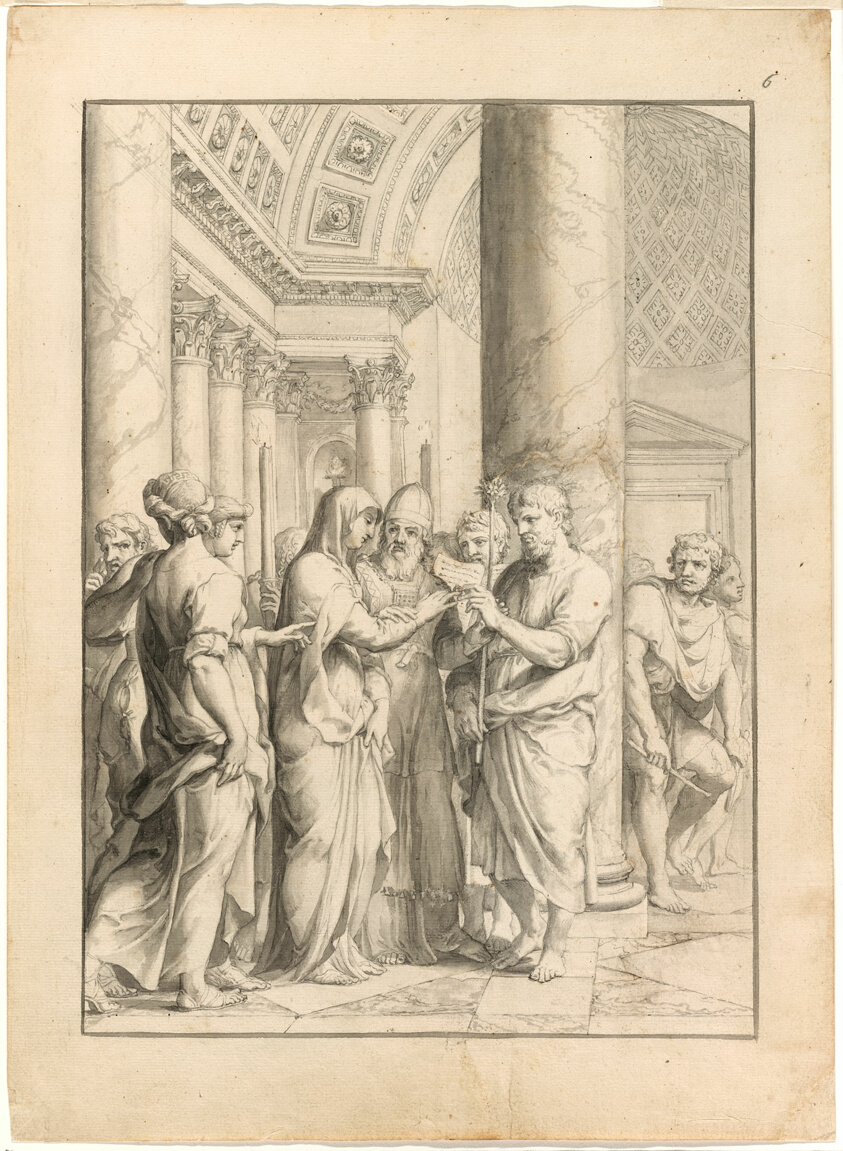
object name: Drawing and Watercolor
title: Marriage of the Virgin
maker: Jacques Stella (French, 1596-1657)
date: c. 1640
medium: Pen and black ink, with brush and gray and pale brown wash and graphite, on pieced cream laid paper (two figures before column are cut from a similar paper and inserted over a slightly smaller hole in the primary support)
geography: France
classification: pen and ink drawings; drawings (visual works); prints and drawing